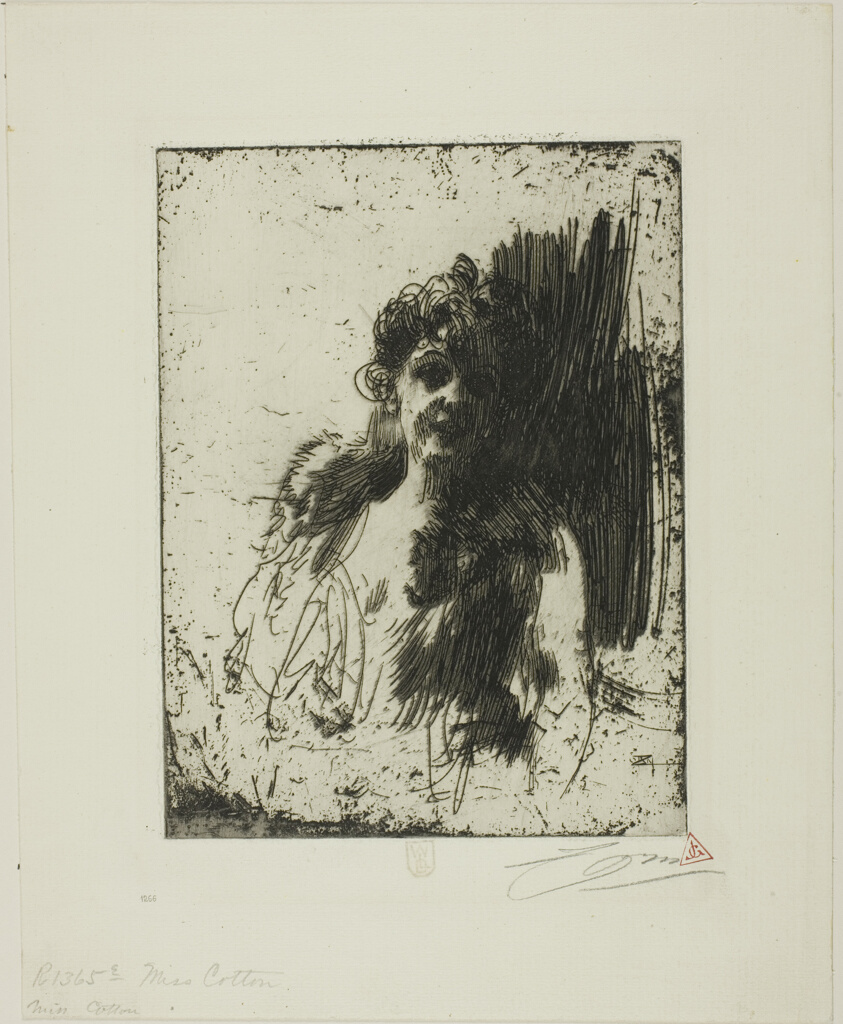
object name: Print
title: Mrs. Cotton II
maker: Anders Zorn (Swedish, 1860-1920)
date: 1901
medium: Etching on ivory laid paper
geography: Sweden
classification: etching; print; prints and drawing